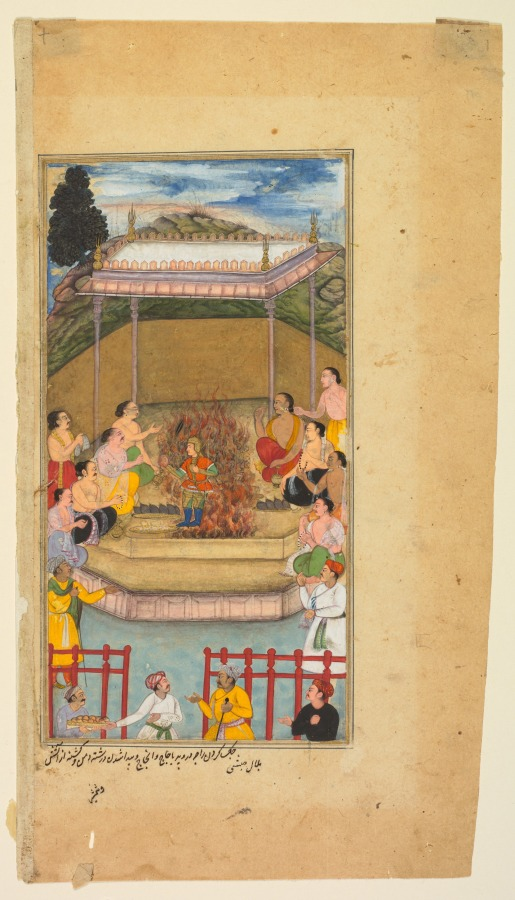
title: Yaja and Upayaja perform a sacrifice for the emergence of Dhrishtadyumna from the fire, from Adi-parva (volume one) of the Razm-nama (Book of Wars) adapted and translated into Persian by Mir Ghiyath al-Din Ali Qazvini, known as Naqib Khan (Persian, d. 1614) from the Sanskrit Mahabharata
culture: Mughal India; made for Abd al-Rahim the Khan Khanan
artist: attributed to Bilal Habshi (probably Ethiopian, active late 1500s)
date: 1598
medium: Gum tempera, ink, and gold on paper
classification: Painting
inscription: Inscriptions around painting: Ascribed to Bilal Habashi (probably Ethiopian, active late 1500s) Mughal court, made for Abd al-Rahim the Khan Khanan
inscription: Persian inscription in bottom margin, in nasta‘liq script: The performing of a sacrifice by King Drupada with Yaja and Upayaja and the appearing of Dhrishtadyumna and Draupadi from the fire; Bilal-i Habashi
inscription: Persian inscription at edge of bottom margin, in nasta‘liq script: and sword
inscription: Calligraphy: Persian text in naskh script: “. . . and rules in Panchala. I want you to take him and bring him to me.” They went to war with Drupada and fought a battle, and King Drupada managed to overcome the Kauravas and put them to flight, but the Pandavas fought him and brought him to Master Drona. Droṇa took half of his [Drupada’s] kingdom from him and left him the other half. King Drupada was extremely distressed that Master Drona had overcome him and wished he could have an offspring who would kill Master Drona. With this desire in his mind, he went to the shores of the Ganges River so that perchance he could find a person whose prayers on his behalf to the almighty God to graciously bestow upon him an offspring capable of killing Droṇa would be accepted. By the banks of the Ganges he saw two pious worshipers. One was called Yaja and the other Upayaja. He spent some time there performing services for them and bringing them whatever they required. After a long while, one day he said to Upayaja: “I would like you to do what is needed so that I have a son who could kill Master Drona. If you do this I will give you one lakh [a hundred thousand] of cows and whatever else you demand.” Upayaja did not accept this. Once again Drupada spent time at their service, and then once again he begged Upayaja to do this. He said: “Go to my elder brother Yaja, since he still has a little attachment to this world, so that he can perform the sacrifice for you, so that the almighty God would bestow on you the offspring that you desire.” King Drupada went therefore to Yaja the brahmin and told him what Upayaja had told him and said: “If you perform the sacrifice for me so that I have son who would kill Master Drona, I would give you eighty thousand cows.” Yaja said, “What kind of a person is Master Drona that you do not deem yourself a match for him?” Drupada said, “Droṇa is the kind of person who remains without rival and peer in the arts of war. His bow is six times the length of the elbow to the fingertip, and nothing in the world can rival and overcome him.” Yaja said: “I will perform the sacrifice for you, so long as my brother Upayaja joins forces with me.” So King Drupada and Yaja both went to Upayaja and pleaded so long that he at last agreed to be present at the sacrifice. They thus made a wish for King Drupada to have a son to kill Droṇa and made a big sacrifice, and from the midst of the sacrificial fire suddenly a son emerged clad in a coat of mail holding a bow in one hand.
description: Fire sacrifice was central to the Indo-European people who entered the Indian subcontinent as early as 1800 BC. Only Brahmins, a social class of priests, had access to the sacred texts called the Vedas, which explained the meaning and process of the fire sacrifice, considered by orthodox Hindus as a way to communicate with the gods. A king named Drupada in ancient India sponsored this fire sacrifice in order to generate a powerful warrior who would be able to slay the enemy who took half his kingdom. Seated around an altar in the sacrificial enclosure, Brahmins pour oblations into the fire and recite the prayers necessary to generate the divine warrior Dhrishtadyumna, shown here in full battle armor at birth. The inscription below gives the title and the name of the artist, Habshi, which means “Ethiopian,” suggesting the presence of Africans in the royal Mughal workshop. The story of how the warrior Dhrishtadyumna was generated from the fire sacrifice is written on this page. When King Drupada lost half his kingdom to a military master named Drona, he needed a gift from the gods to defeat him: a new warrior born to accomplish this mission. In order to obtain this gift, King Drupada went to the banks of the Ganges to find two powerful Brahmins to whom the gods would respond favorably. After serving them faithfully and offering payment of 100,000 cows, the Brahmins Yaja and Upayaja agreed to perform the sacrifice. The text is written in a form of Arabic script, called naskh, in the Persian language, as translated from the original Sanskrit epic Mahabharata for emperor Akbar (r. 1556¬–1605). The passages of dialogue are written diagonally.